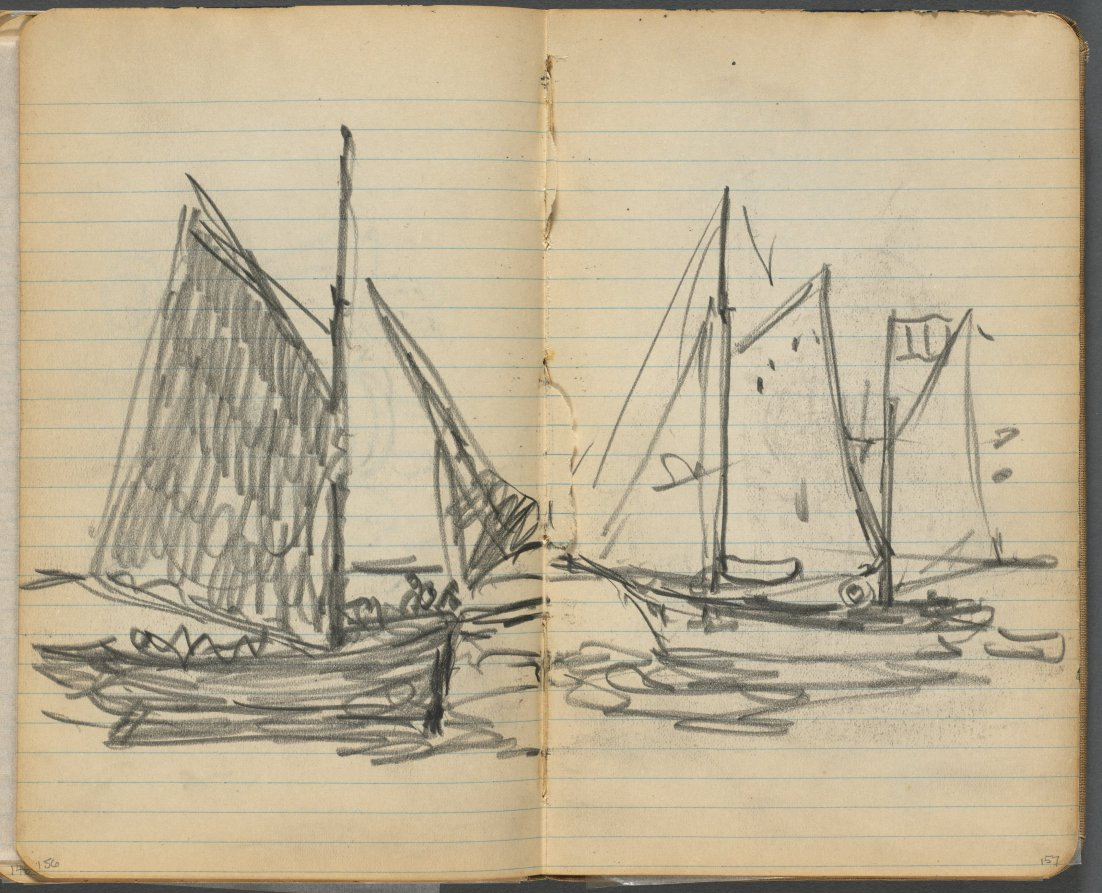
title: Sketchbook, page 156 & 157: View of Sailboats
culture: America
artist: Maurice Prendergast (American, born Newfoundland [now Canada], 1858–1924)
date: 1905–10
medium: graphite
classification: Bound Volume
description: This sketchbook contains 69 pages of drawings, a diary largely devoted to the state of the artist's health, and a three-page discourse on the nature of genius and ideas.